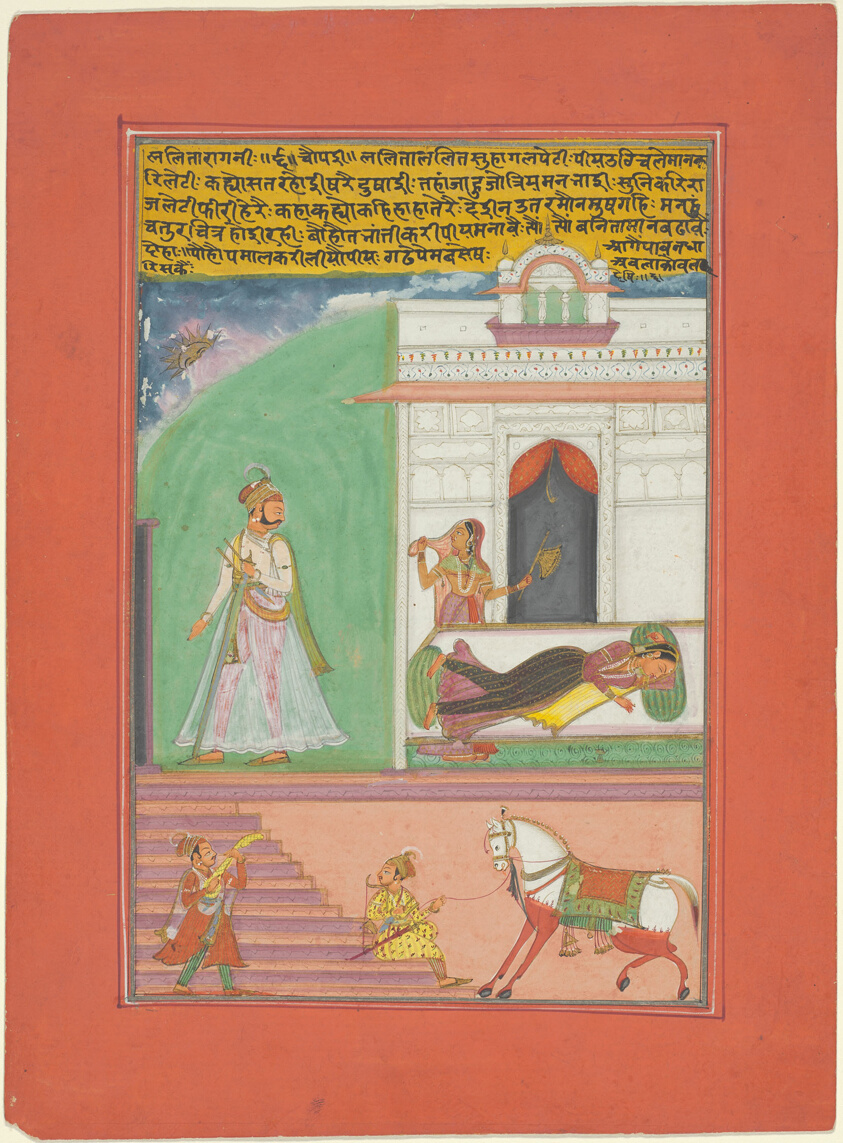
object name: Painting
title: Lalita Ragini, Page from a Jaipur Ragamala Set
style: South Asian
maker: India; Rajasthan, Jaipur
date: c. 1750-1770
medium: Opaque watercolor and gold on paper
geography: Rajasthan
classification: miniature painting; painting; asian art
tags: music, musicians